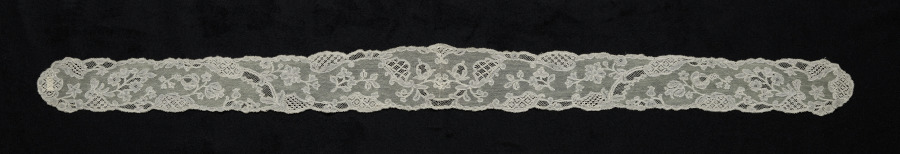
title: Lace Lappet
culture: Belgium, Mechelen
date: 1700s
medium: Linen: bobbin lace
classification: Lace